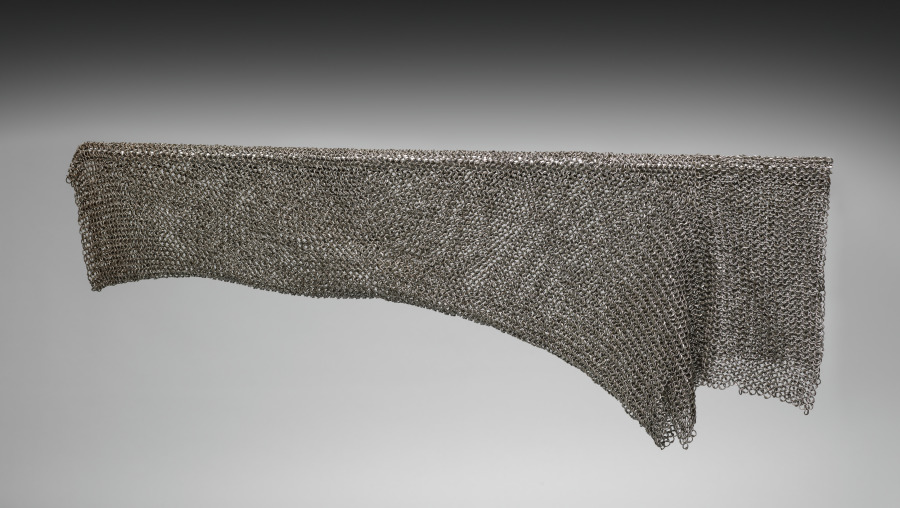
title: Sleeve of Chain Mail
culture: Germany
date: 1500s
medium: steel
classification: Arms and Armor